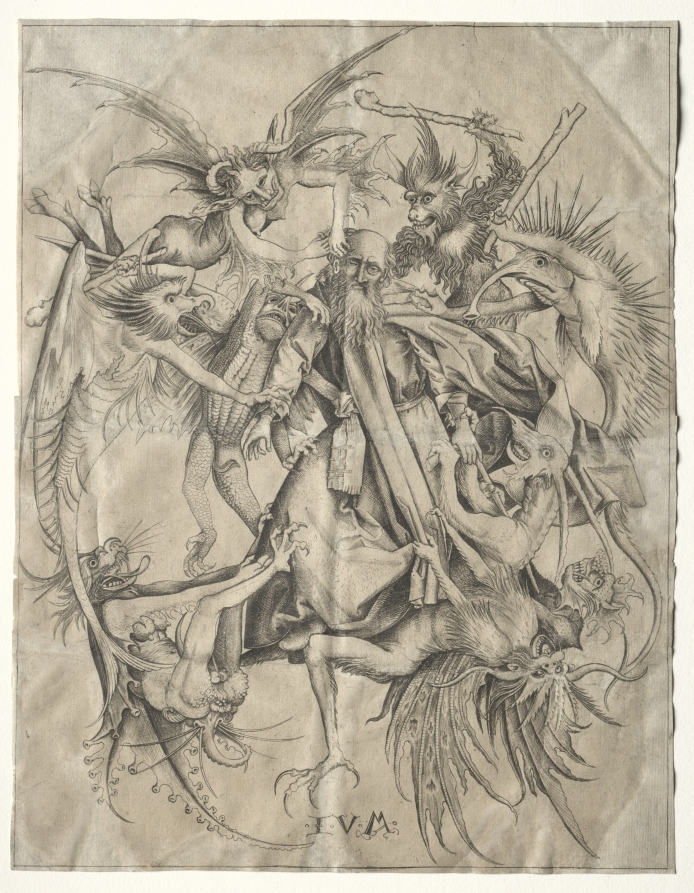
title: St. Anthony Tormented by the Devils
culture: Germany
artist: Master FVB (German)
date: 1475–1500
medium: engraving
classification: Print